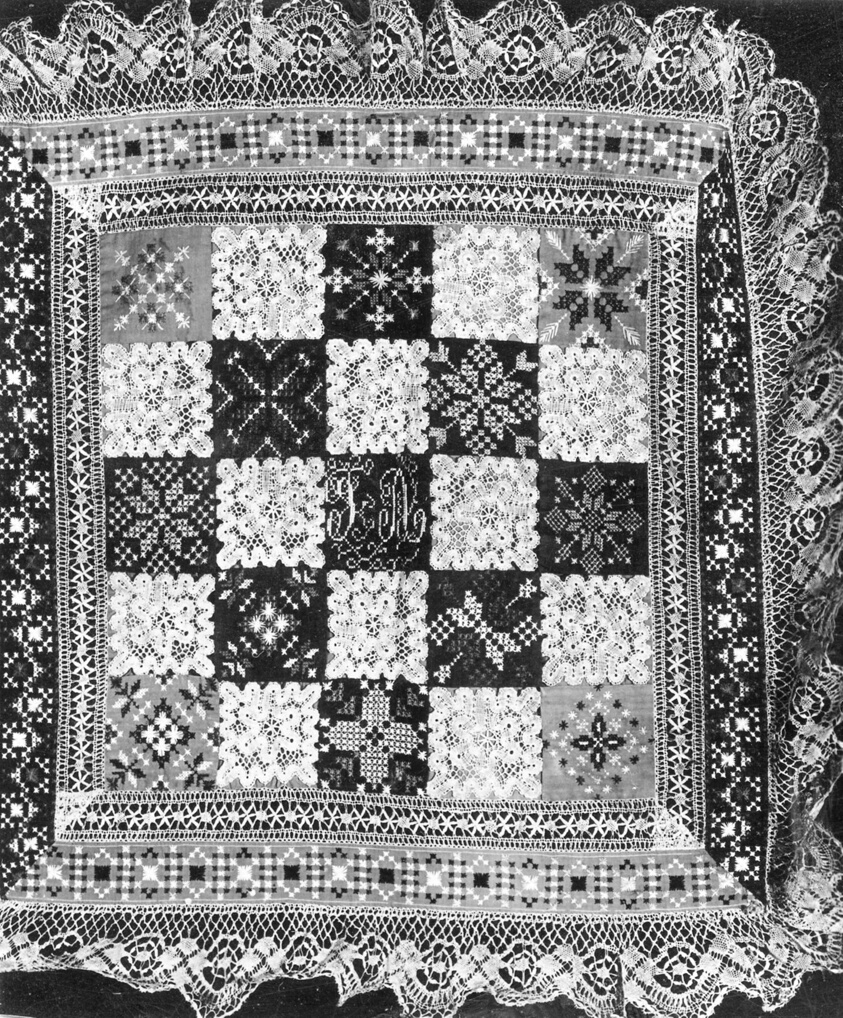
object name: Textile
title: Cover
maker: Europe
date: 1875/1900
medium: Alternating squares of cotton, plain weave; embroidered with silk in cross, double cross, and single satin stitches; with squares of linen, bobbin part lace; insertion and border of linen, bobbin straight lace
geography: Europe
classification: textile; needlework (visual works)